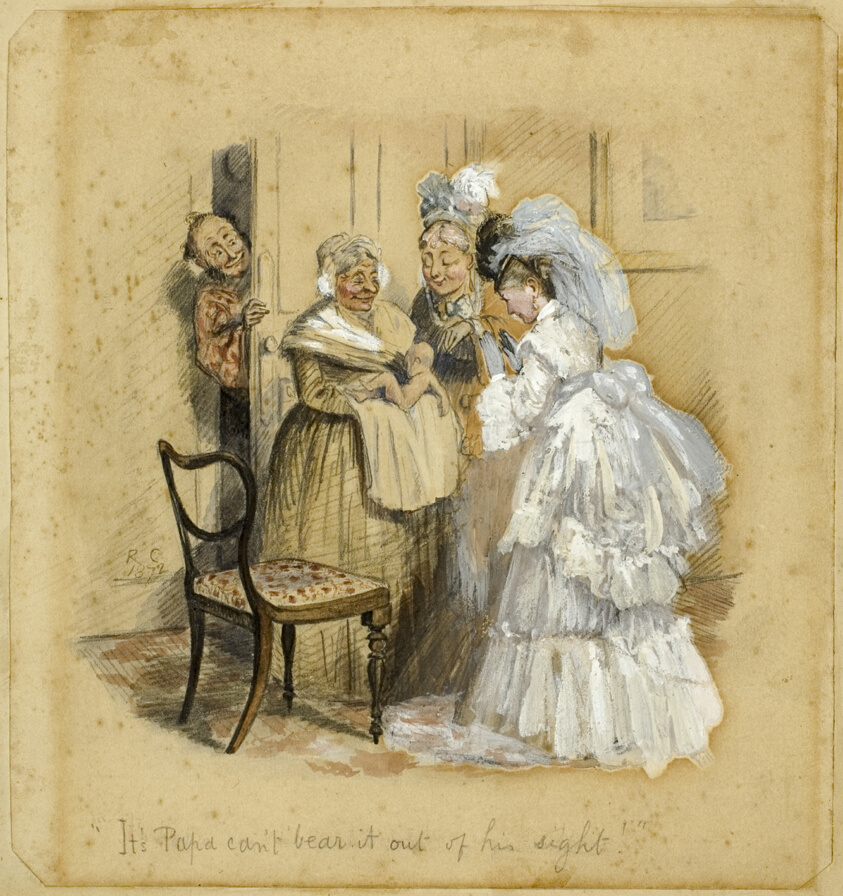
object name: Drawing and Watercolor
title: It's Papa Can't Bear it Out of His Sight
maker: Randolph Caldecott (English, 1846-1886)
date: 1872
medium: Gouache and watercolor with graphite, on cream wove paper (discolored to tan), laid down on tan wood-pulp board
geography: England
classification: gouache; drawings (visual works); prints and drawing